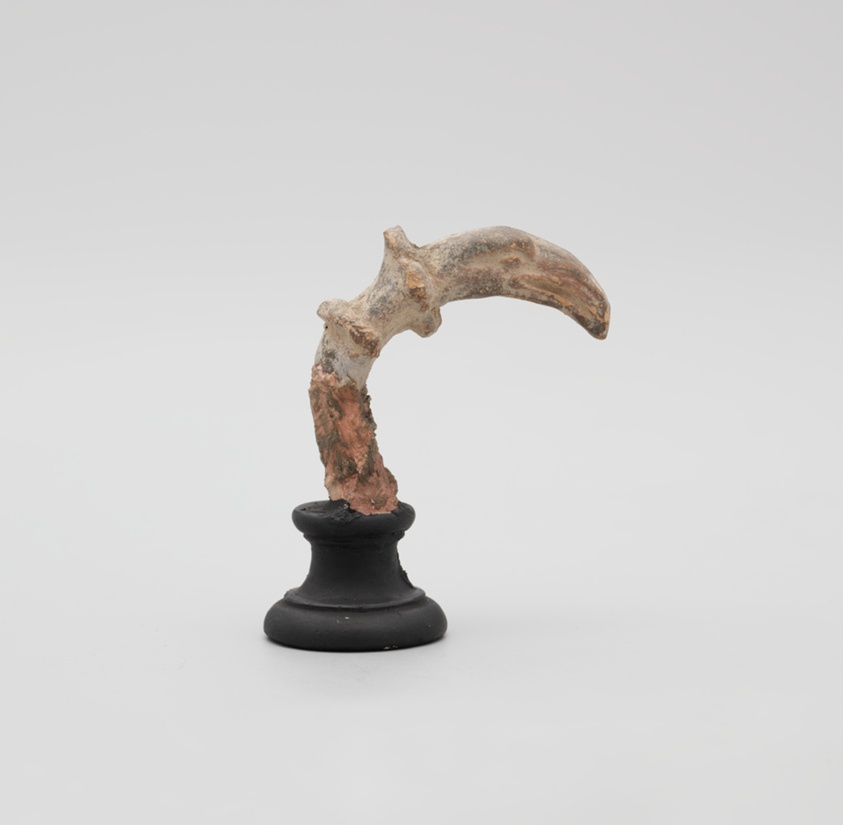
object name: Sculpture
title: Fragment of a Bird Head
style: greek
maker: Greek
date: 2nd/1st century BCE ?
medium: terracotta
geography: Greece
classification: earthenware; ceramics; sculpture; ancient art